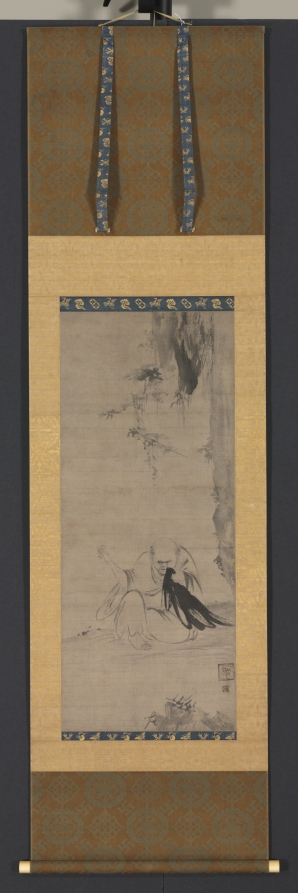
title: Monk Mending Clothes in the Morning Sun (Chōyō Hotetsuzu)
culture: Japan, Nanbokuchō period (1336–92)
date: c. 1350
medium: hanging scroll; ink on paper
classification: Painting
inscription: Seals: Kaō, Ninga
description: This painting illustrates the Zen ideal of cultivating one’s spirit through all moments of life, from the mundane to the marvelous. The monk pictured is simply mending his robes, but it is a meditative activity. A “mending clothes” image would typically form a pair with another on the theme of “reading by moonlight.” While the seals on the painting were added at a later date, similar seals appear on other ink figures and bird-and-flower compositions.